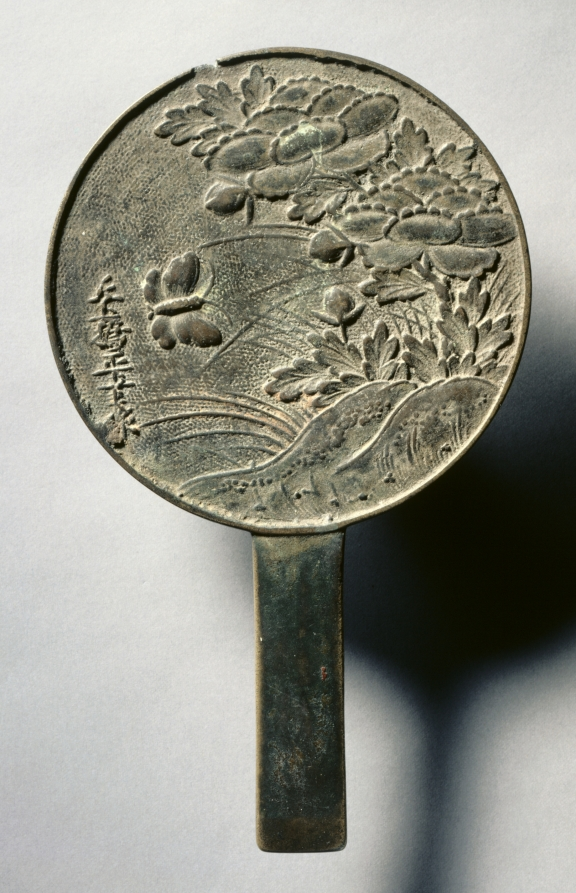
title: Mirror with Handle, Decorated with a Butterfly and Blooming Peony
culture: Japan, Edo period (1615–1868)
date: early 1600s to mid-1800s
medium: bronze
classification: Metalwork